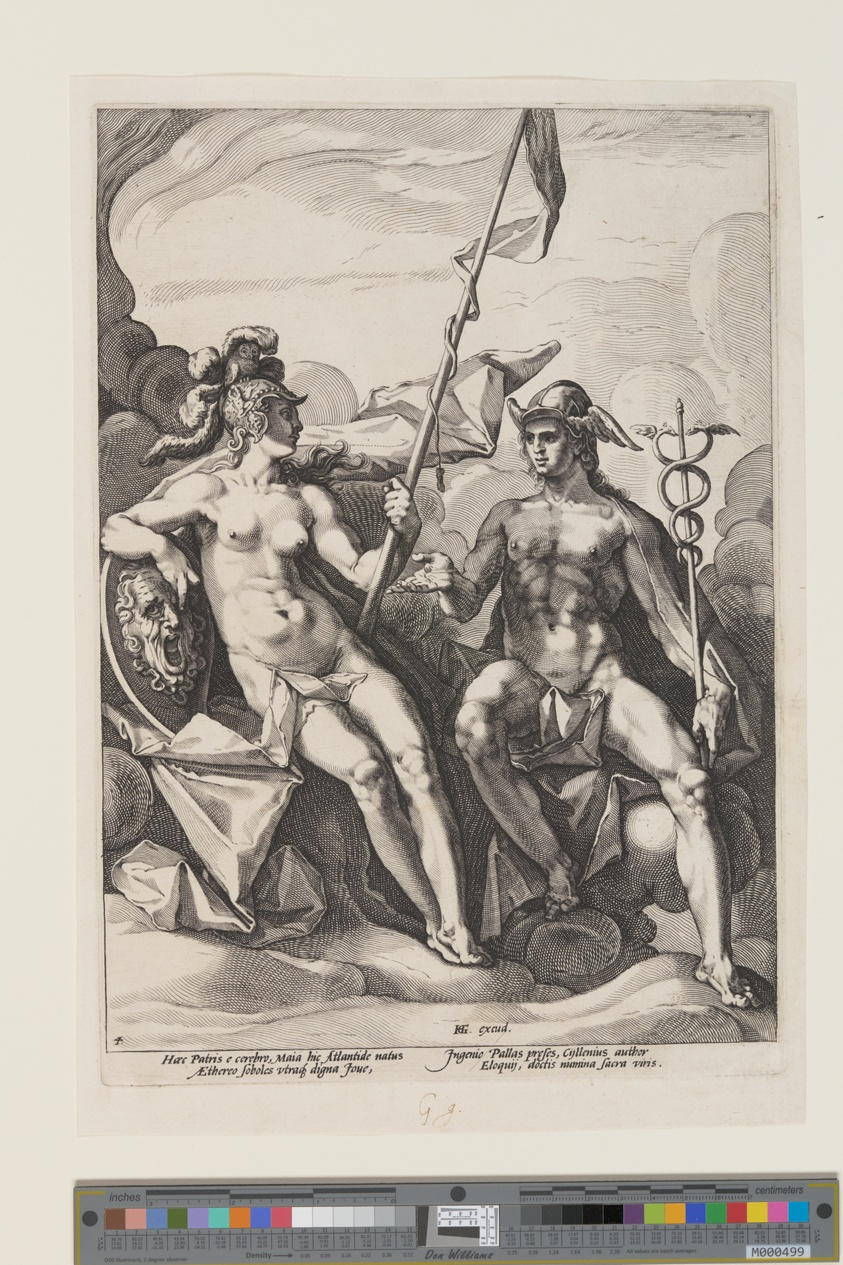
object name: Print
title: Pallas Athena and Mercury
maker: Jacob Matham (Dutch, 1571–1631); after Hendrick Goltzius (Dutch, 1558–1617)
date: c. 1600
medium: Engraving on ivory laid paper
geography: Netherlands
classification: print; paper; prints and drawing; engraving